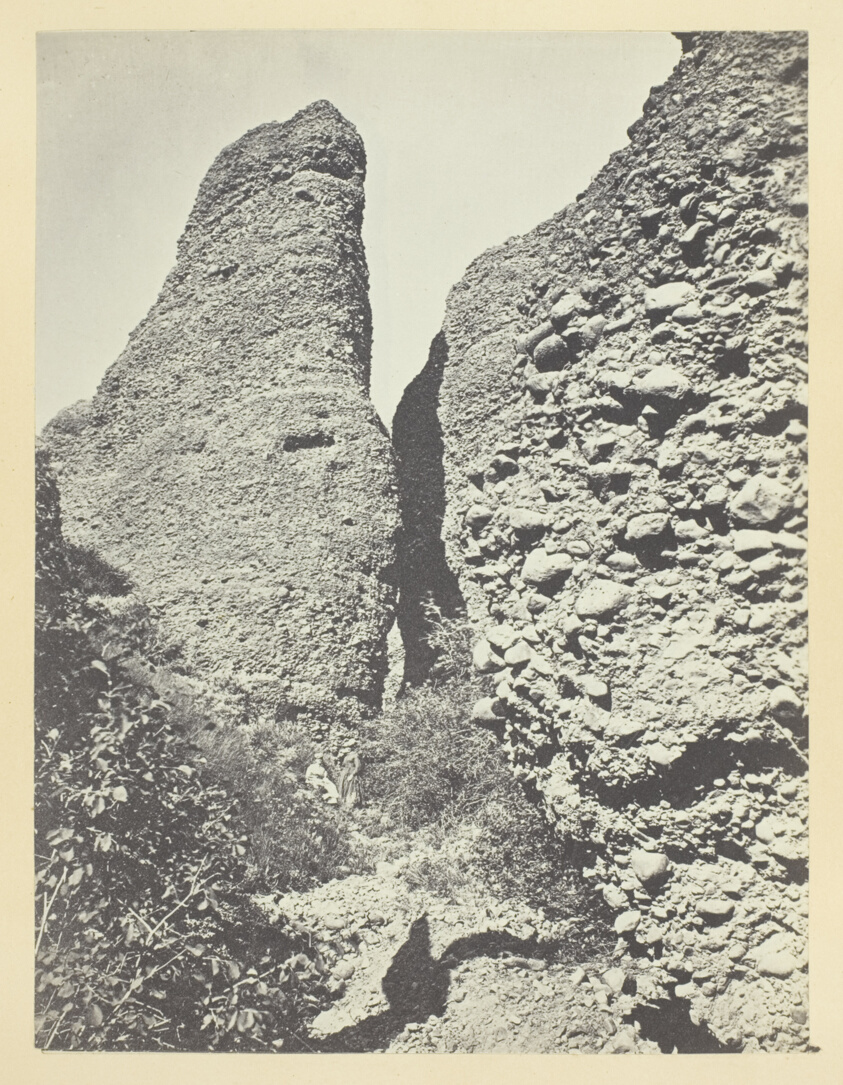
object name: Photograph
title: Conglomerate Peaks of Echo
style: 19th century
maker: Andrew J. Russell; American, 1830–1902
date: 1868/69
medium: Albumen print, pl. XV from the album "Sun Pictures of Rocky Mountain Scenery" (1870)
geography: United States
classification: photograph; albumen silver print; photography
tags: Collected by Hugh Edwards